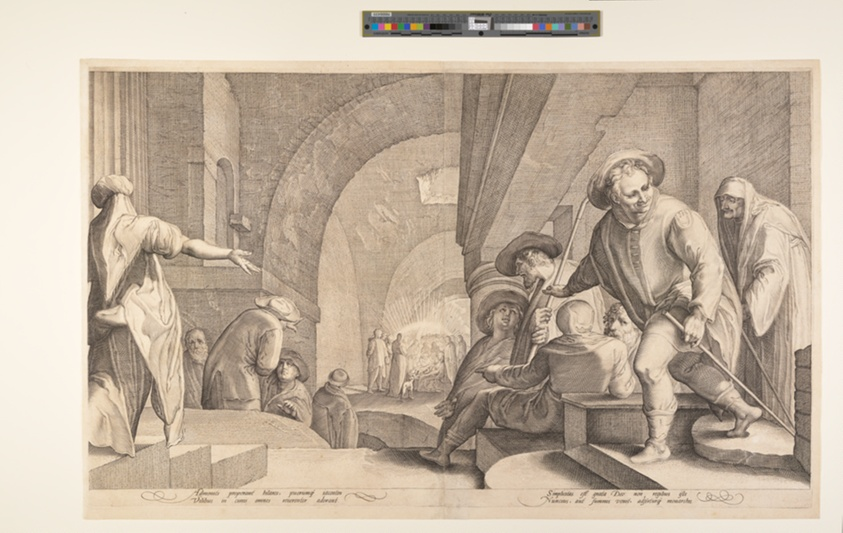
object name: Print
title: The Adoration of the Shepherds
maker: Jan Saenredam (Dutch, 1565–1607); after Karel van Mander (Dutch, 1548–1606)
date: c. 1590-1600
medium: Engraving on ivory laid paper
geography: Netherlands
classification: engraving; paper; print; prints and drawing